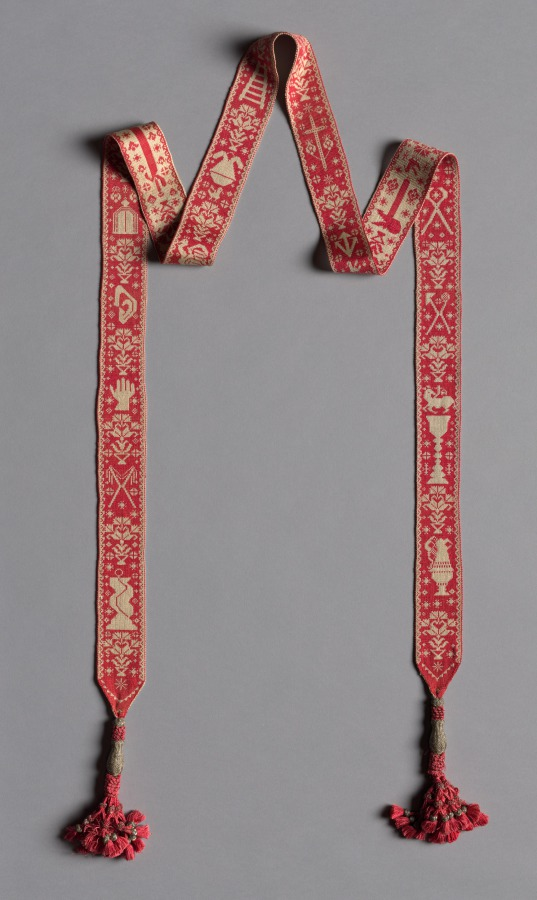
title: Bible Mark (Three of Four)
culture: Spain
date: 1700s–1800s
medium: knitted silk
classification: Knitting